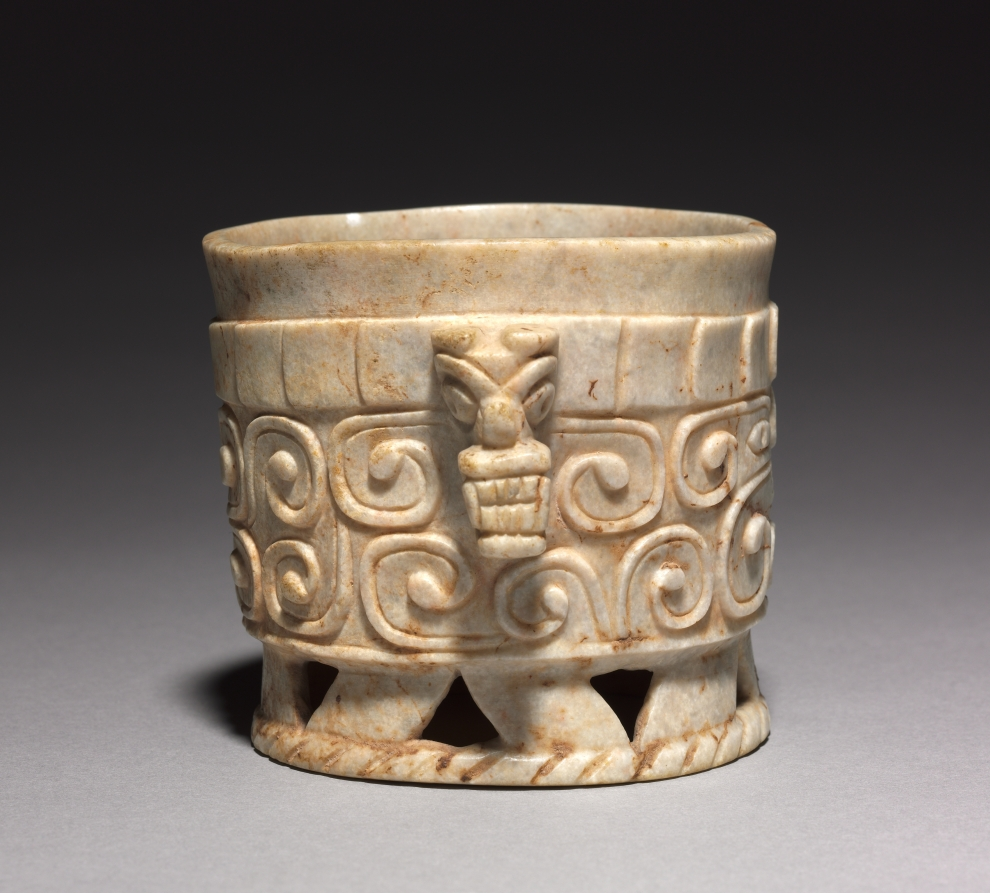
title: Ring-Base Vessel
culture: Honduras, Maya, Ulúa Valley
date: c. 600–1000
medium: marble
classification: Sculpture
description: The Ulúa region of Honduras, to the east of Maya territory, is best known for white marble vessels with walls ornamented in low relief and handles carved as animal heads, here bats but also felines, birds, monkeys, and others. This small example is distinguished by the crispness of its carved scrolls and the triangular cutouts of its pedestal base.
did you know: One of two vessels that were the first ancient American artworks collected by James and Florence Gruener.